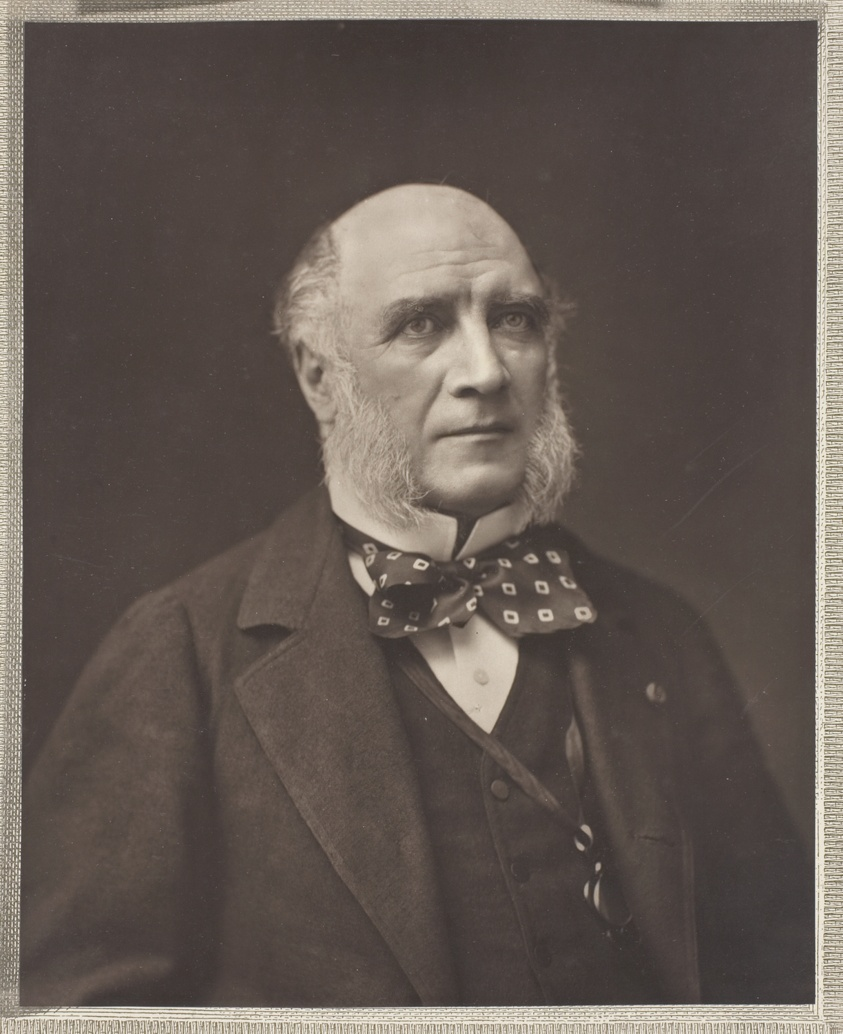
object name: Photograph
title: Élie-Louis, duc Decazes (French statesman and diplomat, 1819-1886)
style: 19th century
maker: Nadar (Gaspard Félix Tournachon) (French, 1820–1910)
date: c. 1853/77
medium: Woodburytype, from the periodical “Galerie Contemporaine Littéraire, Artistique” (1877), volume 2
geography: France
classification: woodburytype; photomechanical process; photography; photograph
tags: Collected by Hugh Edwards, Contemporaine Littéraire